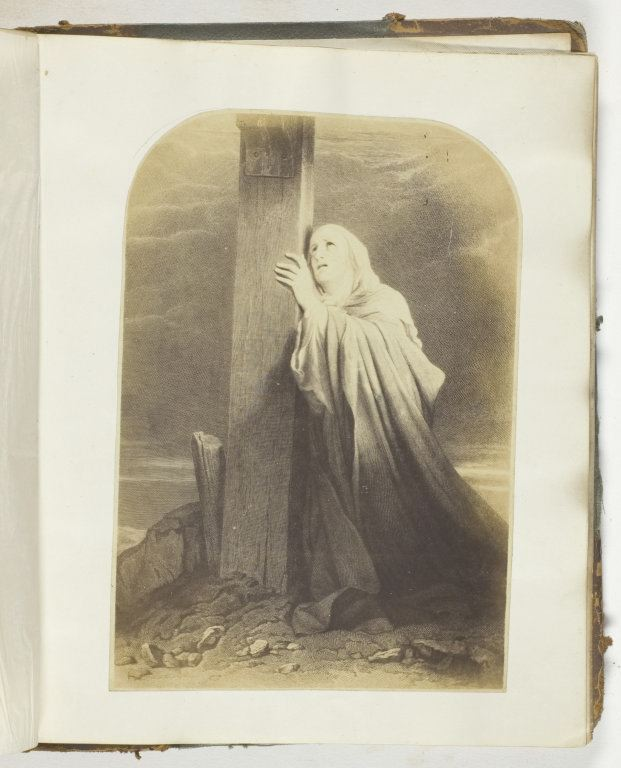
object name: Photograph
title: Untitled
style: 19th century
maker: Georgina Cowper, attributed; English, mid 19th century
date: 1855/68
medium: Albumen print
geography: England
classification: photograph; albumen silver print; photography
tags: Collected by Hugh Edwards, Untitled Album 1849-60, Auld Lang Syne